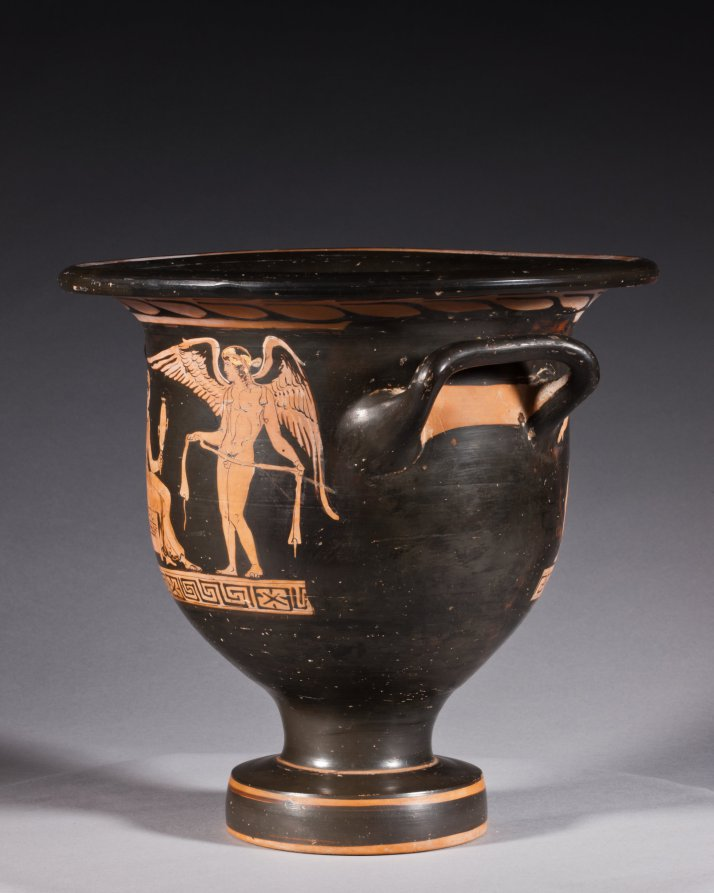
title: Red-Figure Bell Krater (Mixing Vessel): Aphrodite and Eros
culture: South Italian, Apulian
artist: attributed to Graz Painter (South Italian, Apulian, active c. 380–360 BCE)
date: c. 370–360 BCE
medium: ceramic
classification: Ceramic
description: This small mixing vessel shows a finely dressed woman seated on a chest and holding up a mirror to admire herself. Before her stands Eros, the winged god of love, holding a ribbon or sash. Behind the woman stands a pillar with the inscription ΑΦΡΟΔΙΤΗ, or APHRODITE, the goddess of love. Such labels are rare on vases, and scholars debate whether this names the woman shown as Aphrodite herself, with her son Eros, or a bride envisioning herself as Aphrodite, just before her wedding.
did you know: The dancing nude youths on the reverse are unusual; typically they would be standing and draped.